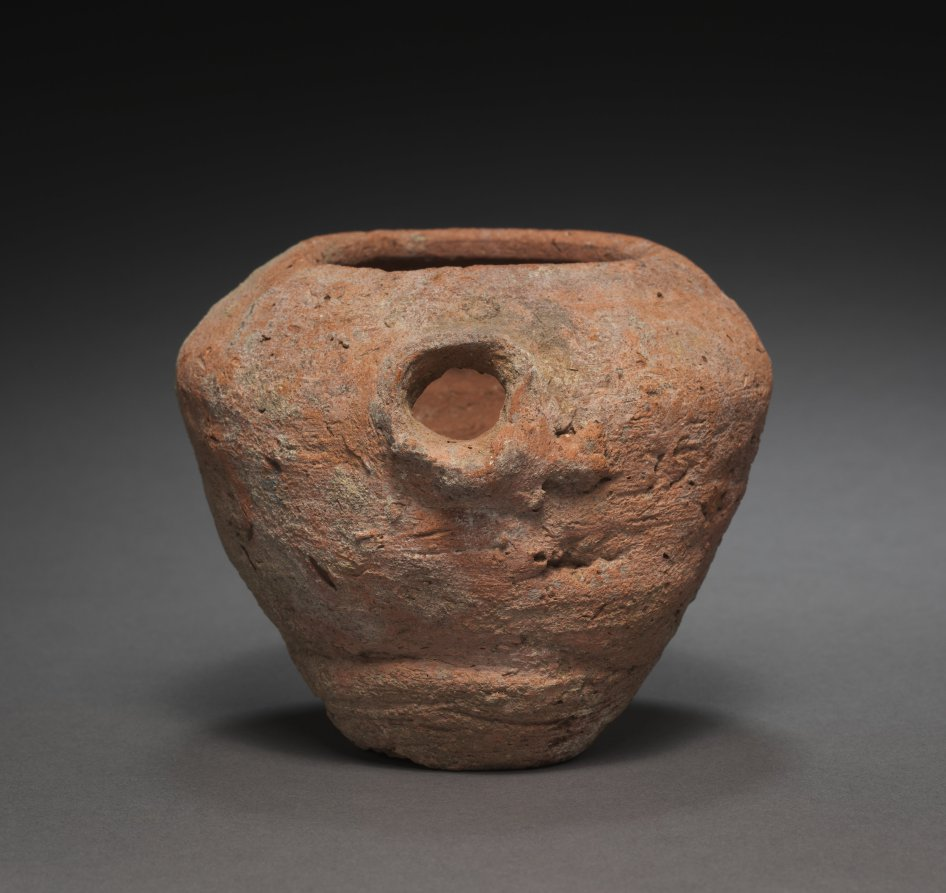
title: Spouted Jar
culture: Egypt, Middle Kingdom (2040–1648 BCE)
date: 2040–1648 BCE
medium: Nile silt ware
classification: Vessels